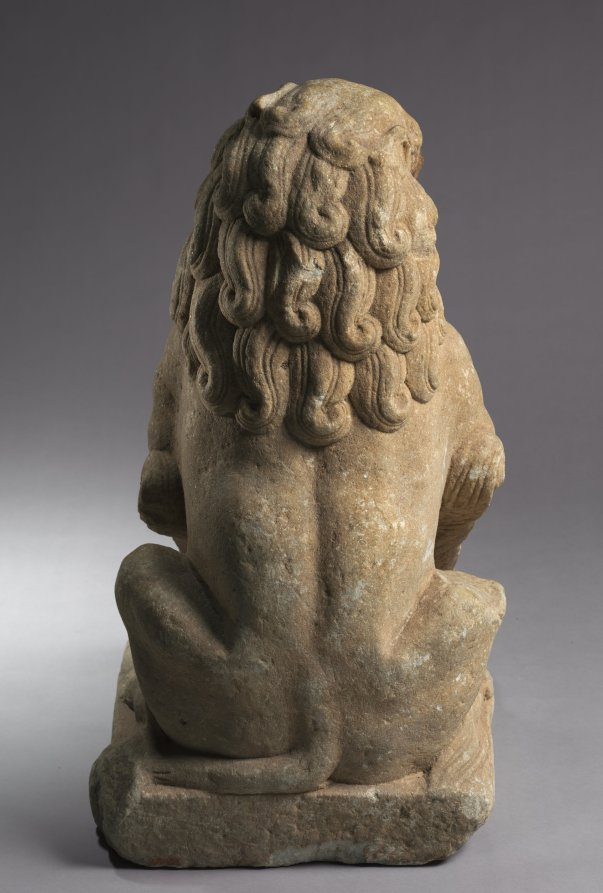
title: Guardian Lion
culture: China, Tang dynasty (618-907)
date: c. 600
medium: white marble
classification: Sculpture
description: Lion sculptures like this example are often found at the entrance to Buddhist temples in China. It may seem as if they are there to protect the temple. Lions also have had strong associations with Buddhism since the religion’s origin; the dharma, or Buddhist doctrine, is said to be spread through his roar.